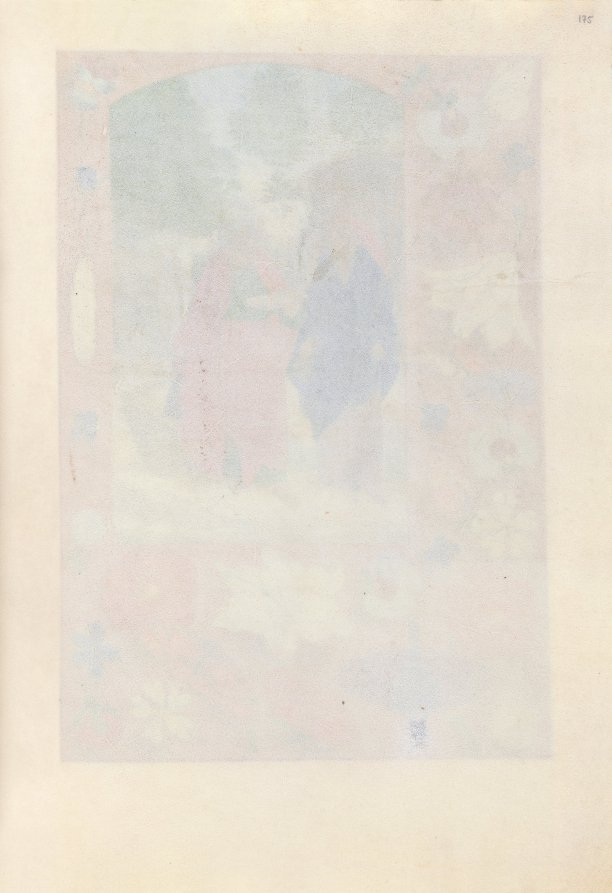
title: Hours of Queen Isabella the Catholic, Queen of Spain: Fol. 175r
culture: Flanders, Ghent and Bruges, late 15th century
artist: Master of the First Prayerbook of Maximillian (Flemish, c. 1444–1519)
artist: and Associates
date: c. 1500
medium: ink, tempera, and gold on vellum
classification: Bound Volume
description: This manuscript was illuminated by a circle of at least five highly organized manuscript painters active in the Flemish cities of Ghent and Bruges. The principal illuminator was Alexander Bening, who painted the majority of the book's miniatures. Manuscripts produced by this circle of artists are renowned for the decoration of their borders, which typically feature a rich variety of realistically-painted flowers, birds, and butterflies. This prayer book, called a book of hours, was intended not for a cleric, but for the private devotions of a lay person-in this case, Isabella the Catholic, Queen of Spain (1451-1504). Isabella's coat of arms embellishes the book's frontispiece. It is unlikely that the book was commissioned by the Queen herself; rather, she probably received it as a diplomatic gift from someone courting her patronage, perhaps Cardinal Francisco Jimenez de Cisneros. A Franciscan friar, Jimenez was dependent upon Isabella for his advancement, first to the post of Queen's confessor in 1492, and then to Archbishop of Toledo in 1495.